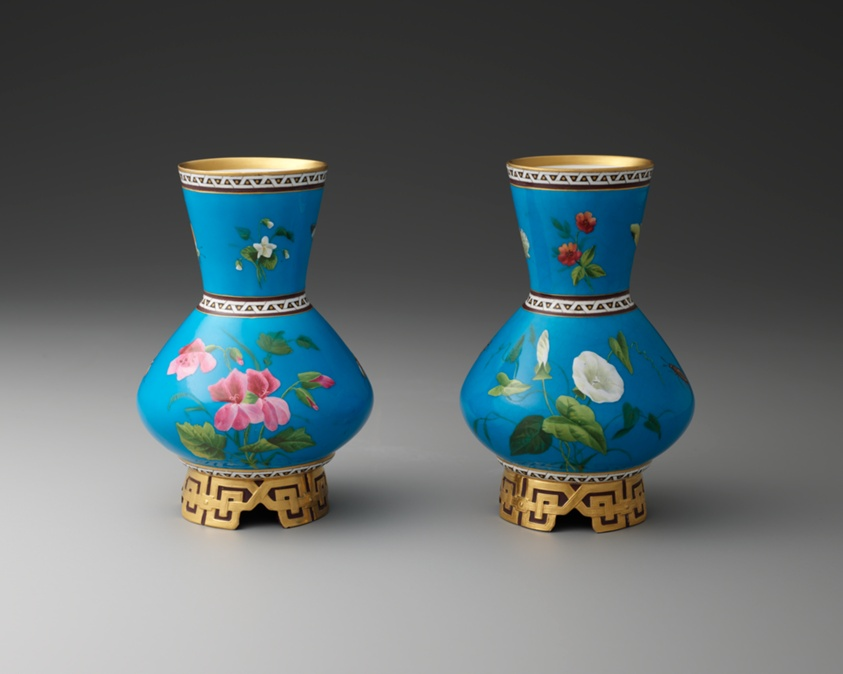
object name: Ceramics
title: Pair of Vases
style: Japanism, 19th century, Aesthetic Movement, Aestheticism, english, japonism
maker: Probably designed by Christopher Dresser (English, born Scotland, 1834-1904); Painted by William Mussill (Austrian, active in France and England, 1828-1906); Minton (Stoke-on-Trent, England, founded 1793)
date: c. 1870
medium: Bone china, enamel, and gilding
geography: Stoke-on-Trent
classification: ceramics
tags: vase, flowers